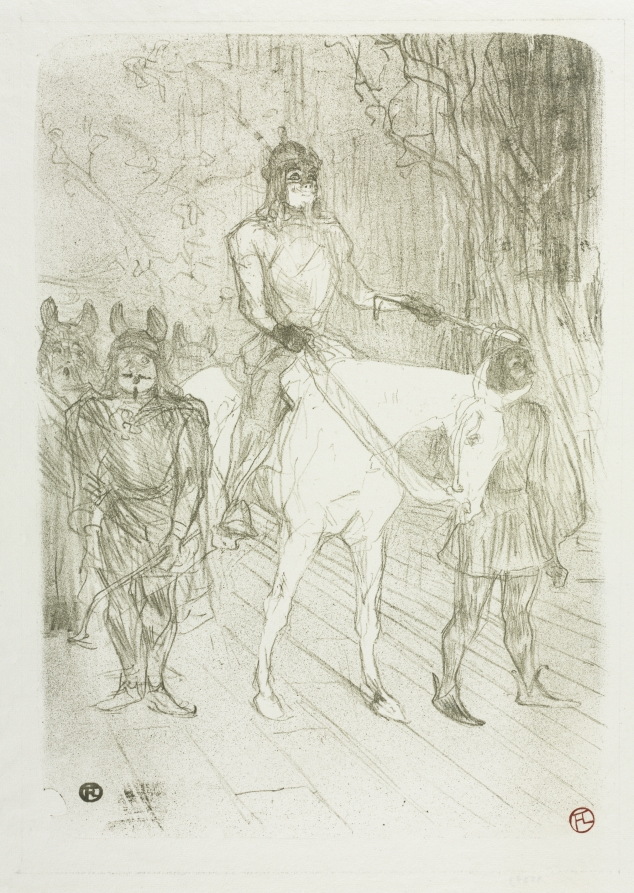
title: Entrée de Brasseur, dans Chilpéric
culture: France, 19th century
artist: Henri de Toulouse-Lautrec (French, 1864–1901)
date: 1895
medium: lithograph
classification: Print